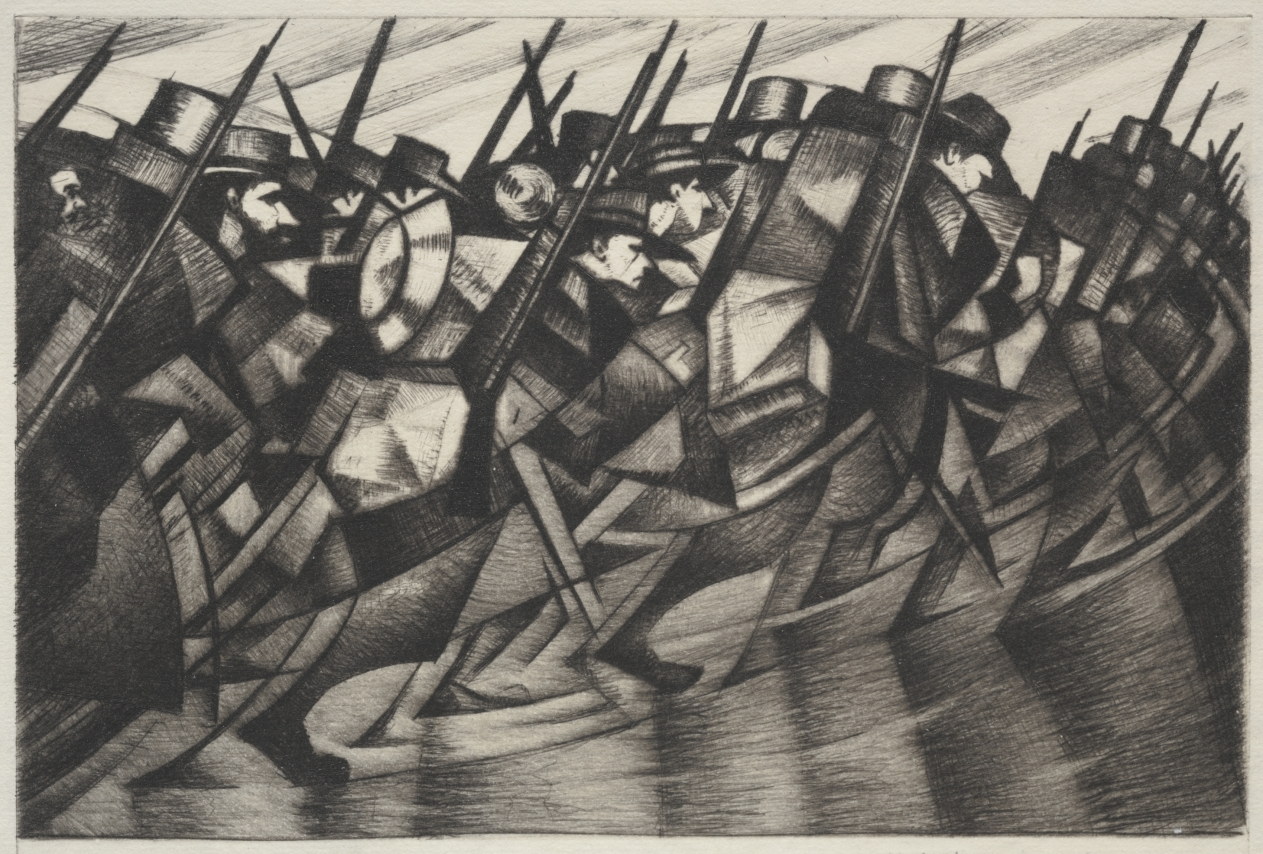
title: Returning to the Trenches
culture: England, 20th century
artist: Christopher Nevinson (British, 1889–1946)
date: 1916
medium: drypoint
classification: Print